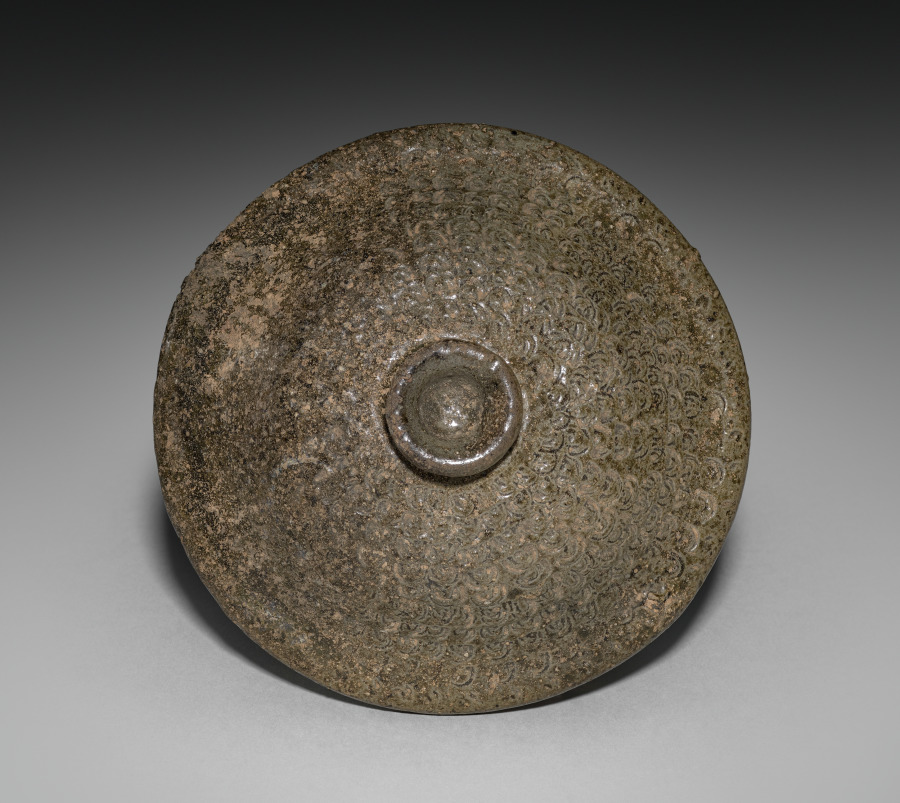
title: Burial Urn with Stamped Design (lid)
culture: Korea, Unified Silla period (676-935)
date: 500s–600s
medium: stoneware with stamped designs under olive-green glaze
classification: Ceramic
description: After the introduction of Buddhism, cremation became a common practice in Korea. This jar, which once contained the remains of the dead, may have nested in a larger stone container. The repetitive patterns that appear on the lid and the container was done with a stamping technique.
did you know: Containing the remains of the dead, this type of ancient clay pottery was excavated from tombs.